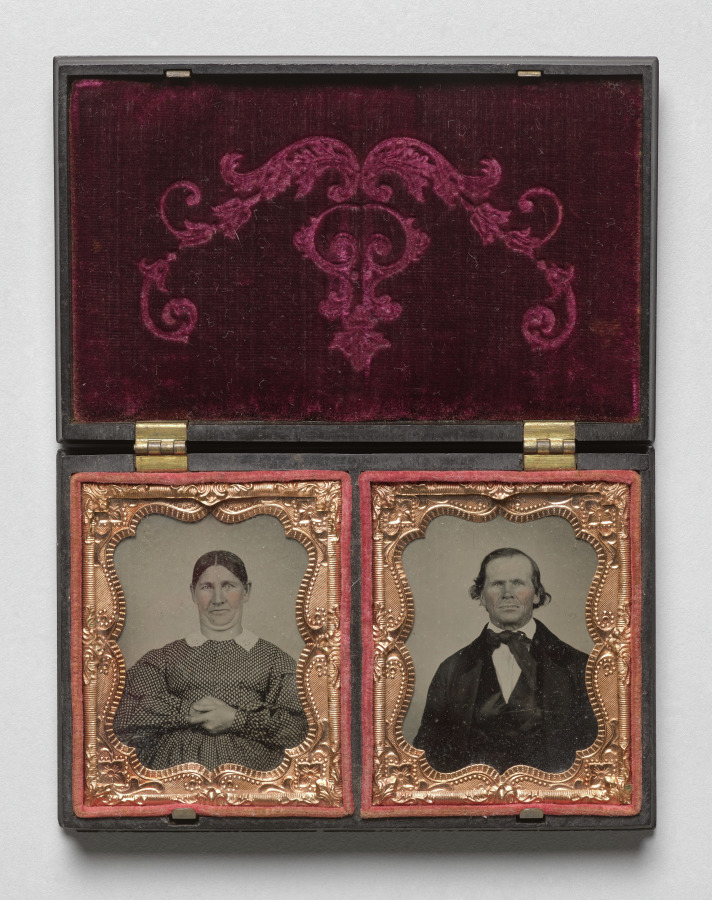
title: Husband and Wife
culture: America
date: c. 1860–65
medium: Two ambrotypes with hand-tinting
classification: Photograph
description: You rarely see a smiling portrait from the mid-19th century. Having your photograph taken was a serious and rare endeavor, plus it was difficult to hold any animated expression long enough for the exposure times required by the early processes. Sitters were instructed to find ways to keep from moving, such as clasping their hands. The woman here has taken the photographers’ cautions to an extreme, resulting in a tense and unflattering portrait.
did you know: In the early decades of photography, many people did not know how to pose for the camera.